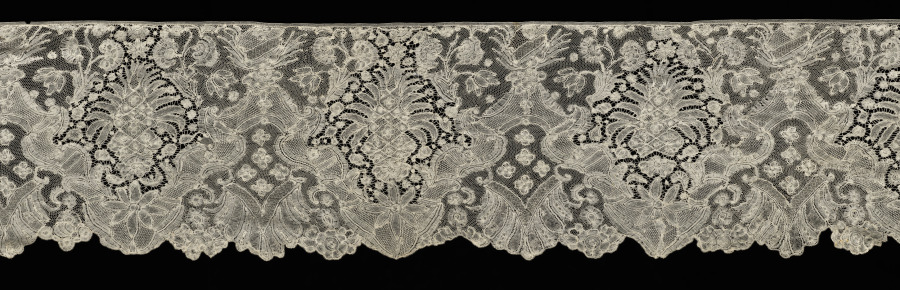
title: Lace Flounce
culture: Belgium, Brabant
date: 1700–1720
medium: Linen: bobbin lace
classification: Lace